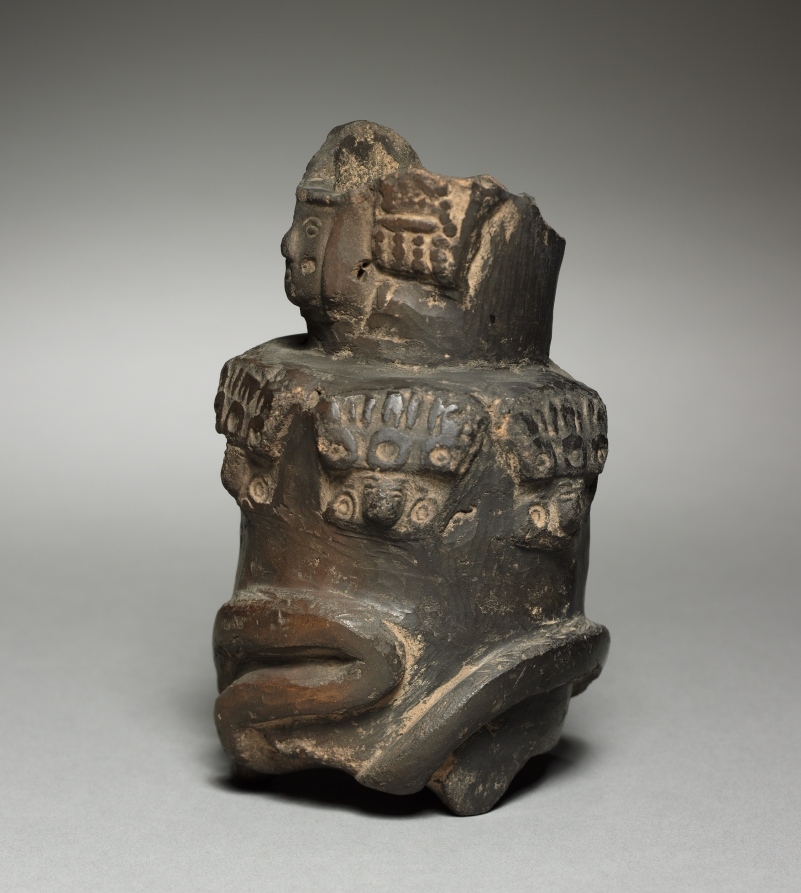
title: Vase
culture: Peru, Tiwanaku style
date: 800–200 BCE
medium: pottery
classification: Ceramic